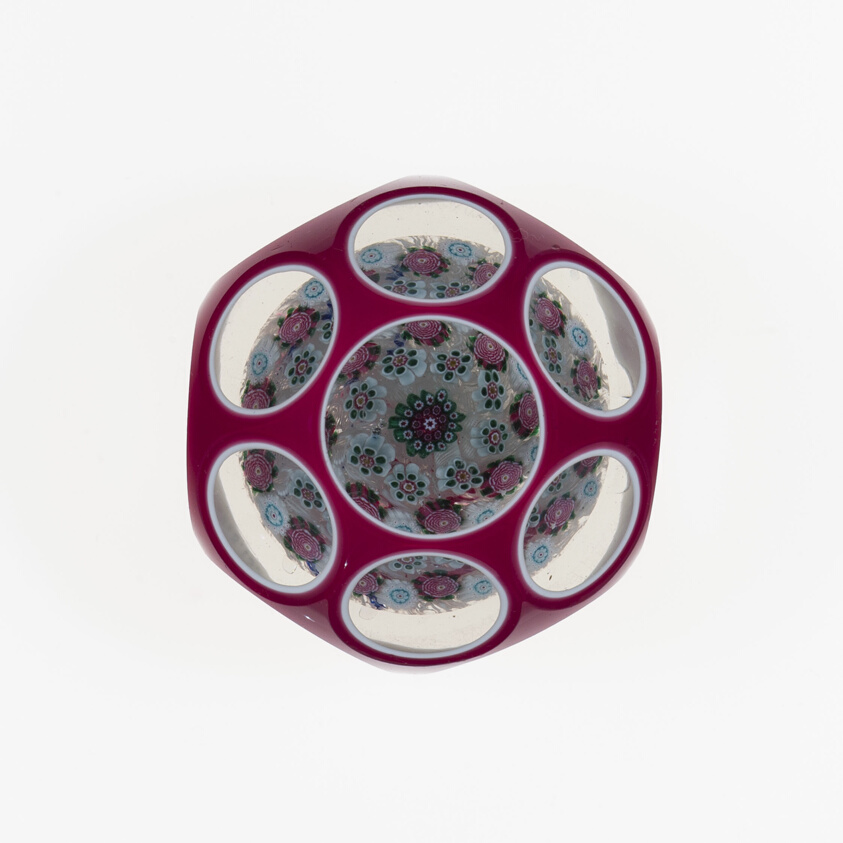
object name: Glass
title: Paperweight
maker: Saint-Louis Glassworks (Cristalleries de Saint-Louis); Lorraine, France, founded 1586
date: c. 1848–55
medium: Glass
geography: France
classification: paperweight; millefiori; european decorative arts; glass